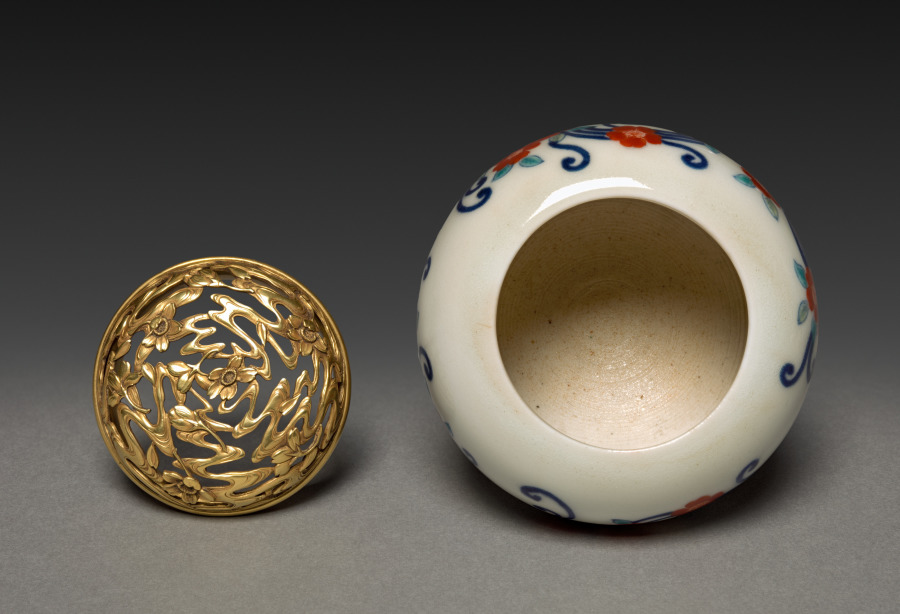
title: Incense Burner with Floral Scroll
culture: Japan, Edo period (1615–1868)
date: early to mid-1800s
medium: Porcelain with underglaze blue and overglaze color enamel (Hizen ware, Nabeshima style)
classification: Ceramic